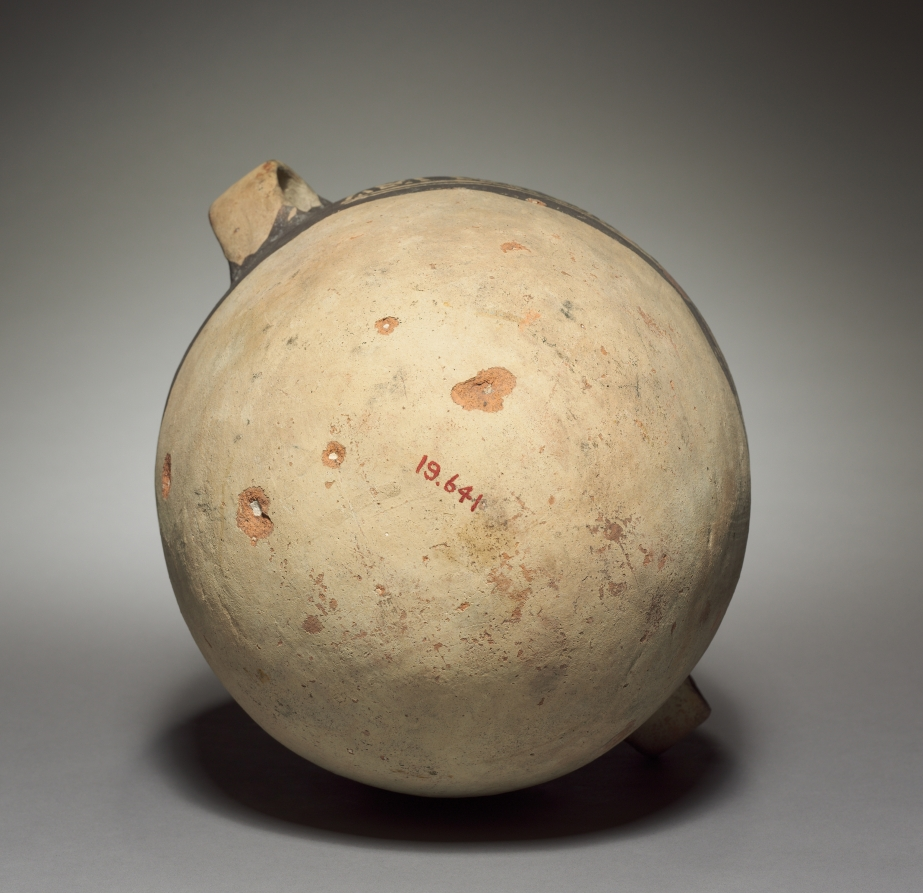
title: Bottle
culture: Peru, Chimú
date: 800–1500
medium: pottery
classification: Ceramic